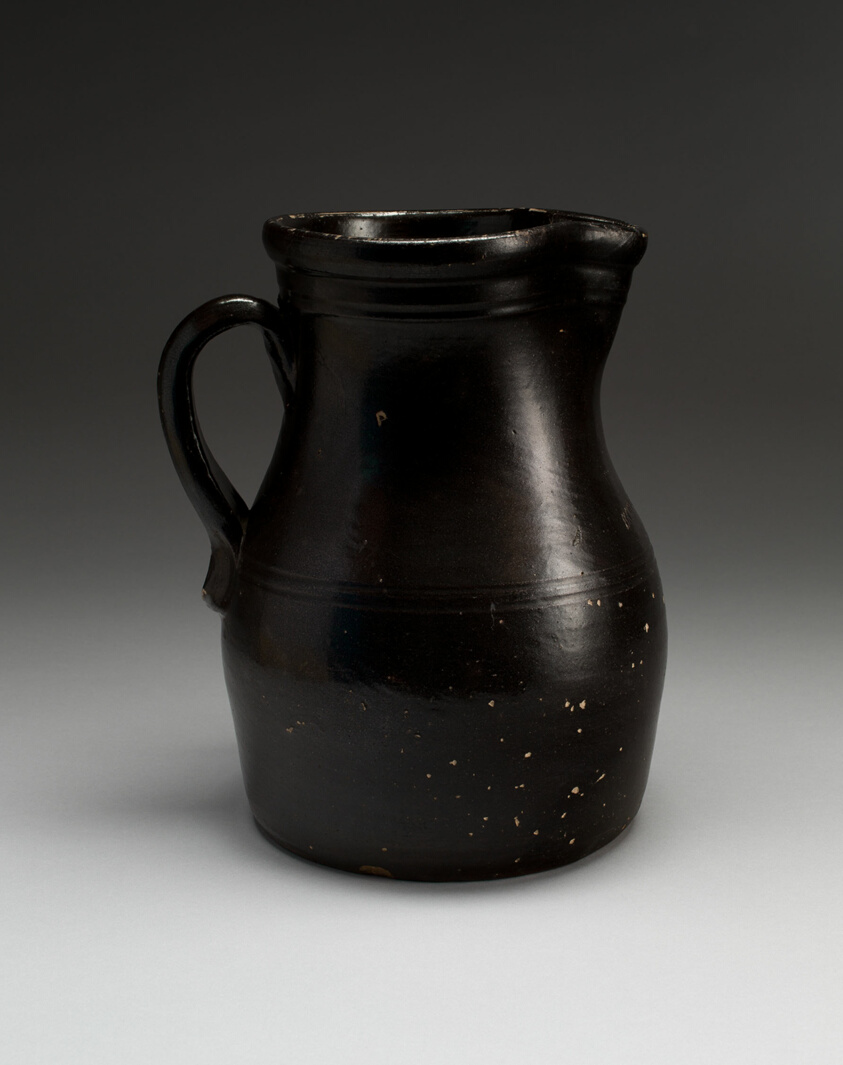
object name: Decorative Arts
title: Pitcher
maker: Artist unknown (American, 19th century); Bangor, Maine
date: 1830–60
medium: Earthenware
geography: Bangor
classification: pitcher (vessel); earthenware; vessel; ceramics; american decorative arts; american arts; decorative arts